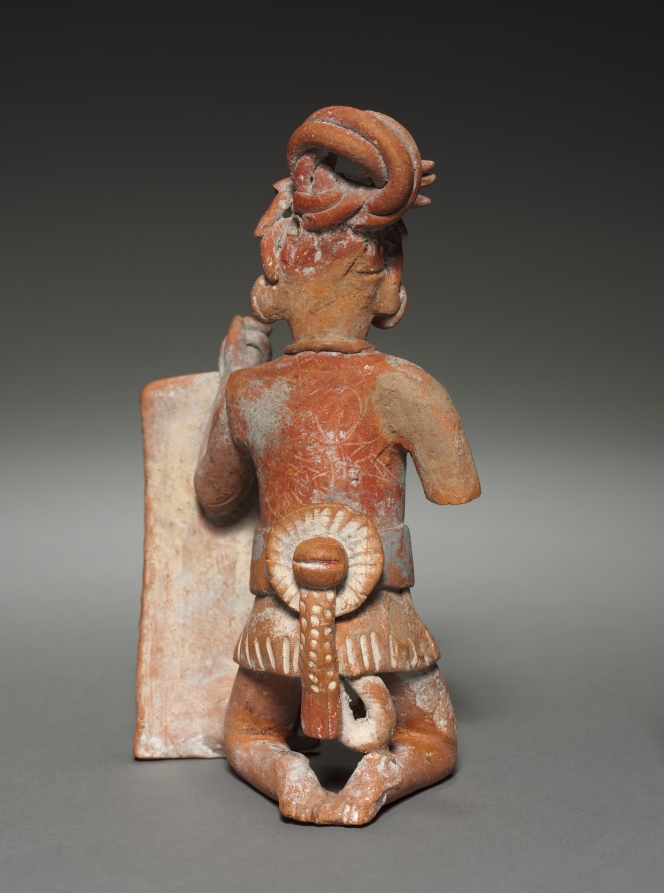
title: Warrior Figurine with Shield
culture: Mexico, Classic Maya, Jaina style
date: 600–900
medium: molded and modeled pottery with traces of pigment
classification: Sculpture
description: Maya figurines portray a wide range of human, animals, and supernatural beings. This example represents a kneeling warrior who holds a rectangular shield and wears elaborate ornaments, including huge ear spools. The expressive, delicate head was made in a mold; the body was hand modeled.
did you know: Elaborate facial tattoos and a bivalve pendent identify this warrior as a sajal, a second-tier noble.